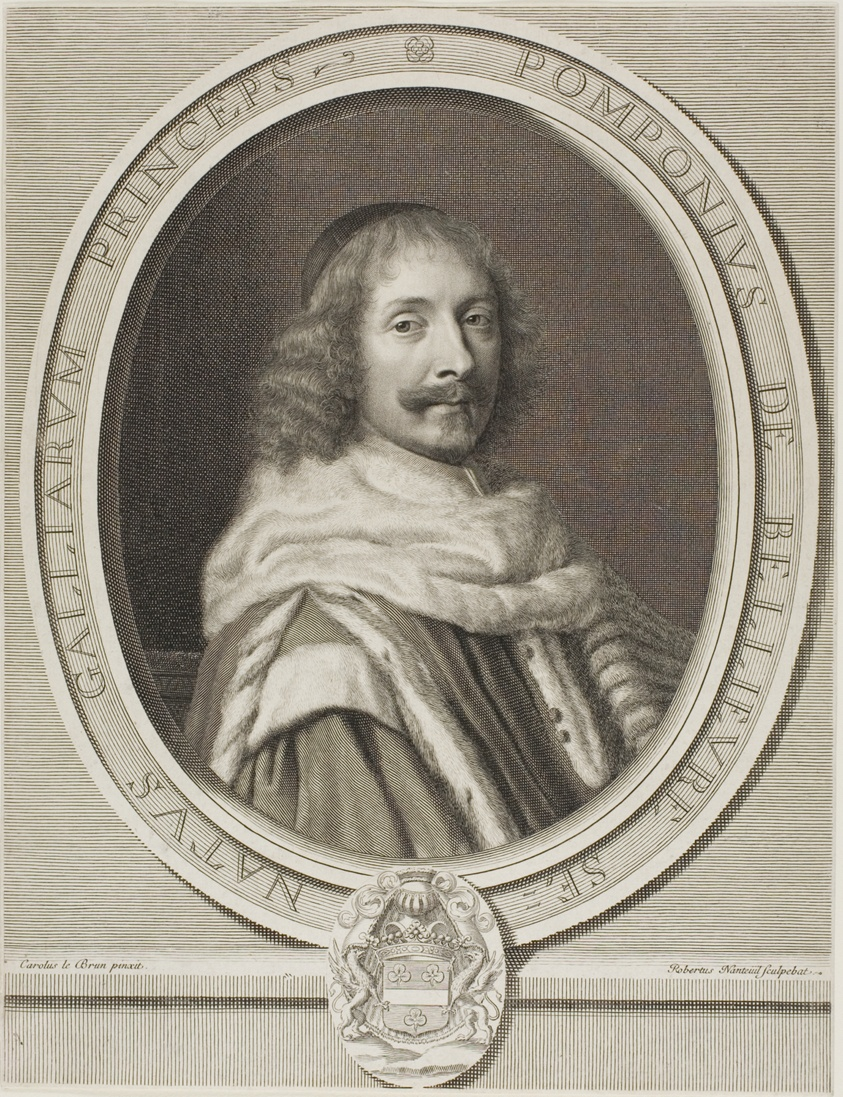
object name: Print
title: Pompone II de Bellièvre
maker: Robert Nanteuil (French, 1623-1678); after Charles Le Brun (French, 1619-1690)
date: 1657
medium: Engraving on paper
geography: France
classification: engraving; print; prints and drawing